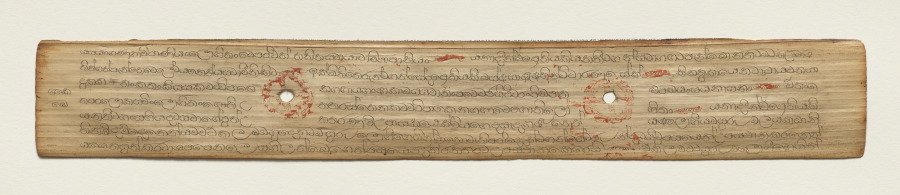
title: Leaf from a Buddhist Manuscript (recto)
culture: Sri Lanka, Singhalese, Late 17th century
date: c. 1700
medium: fiber paper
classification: Manuscript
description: Palm leaf material is still used for manuscripts in Sri Lanka. The palm leaves are prepared first by boiling them, drying them in the sun, and then rubbing them with oils. Scribes then use a metal stylus to incise the text. Then charcoal powder is wiped across the pages, filling in only the inscribed lines.